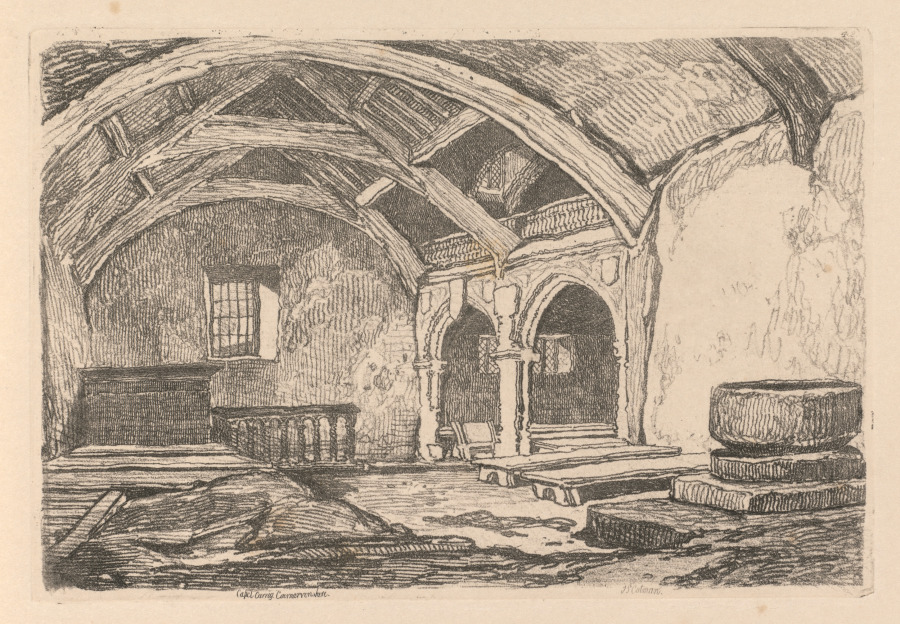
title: Liber Studiorum: Plate 42, Capel Carrig, Caernarvonshire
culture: England, 19th century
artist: John Sell Cotman (British, 1782–1842)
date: 1838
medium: softground etching, from a bound volume containing 48 plates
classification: Bound Volume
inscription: In plate, within image, upper right: 42; in plate, below image: Capel-Carrig, Caernarvonshire. J S Cotman